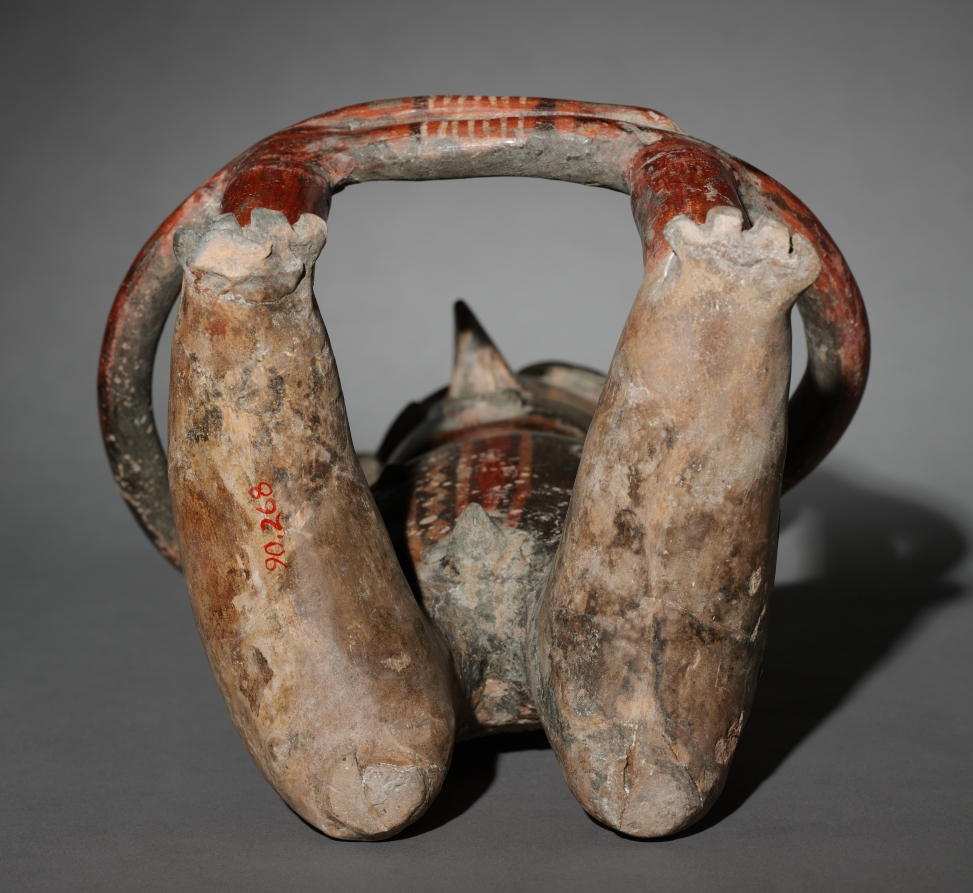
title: Seated Male Figure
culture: Mexico, Jalisco, Zacatecas Style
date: c. 200 CE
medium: earthenware with colored slips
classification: Sculpture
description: A female once accompanied this abstract male. The two may have had the same meaning as the nearby couple. They were also similarly linked by physical form, though the female’s head had no projections, the meaning of which is unknown. The size of the circle formed by the arms suggests that the figure once held something, perhaps a perishable offering.